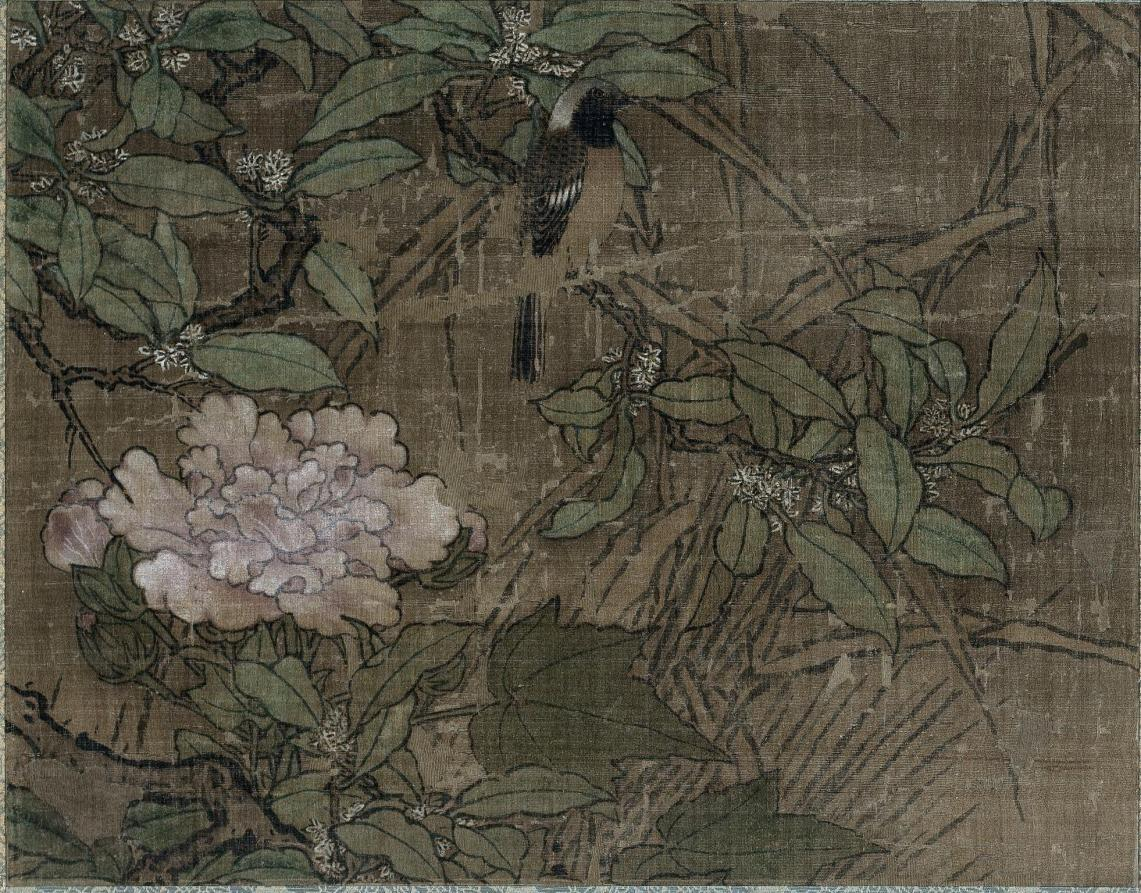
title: Birds and Flowers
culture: Japan, Muromachi period (1392–1573)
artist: attributed to Sesshū Tōyō (Japanese, 1420–1506)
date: mid-1400s–early 1500s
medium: Hanging scroll from a triptych; ink and color on silk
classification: Painting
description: This is one of two paintings possibly by Sesshū Tōyō. They once flanked a central scroll with an ink landscape. The unbalanced nature of the compositions, however, suggests they may be images recycled from larger paintings. The one with sweet osmanthus and hibiscus is an autumn scene, the other is a summer scene with daylilies and gardenias. Folding screens often contrast two seasons or depict all four across a single pair of screens. Sesshū’s works were sufficiently prized that repurposing them in fragmentary form to display in an alcove of a luxurious room would not be an unusual choice.